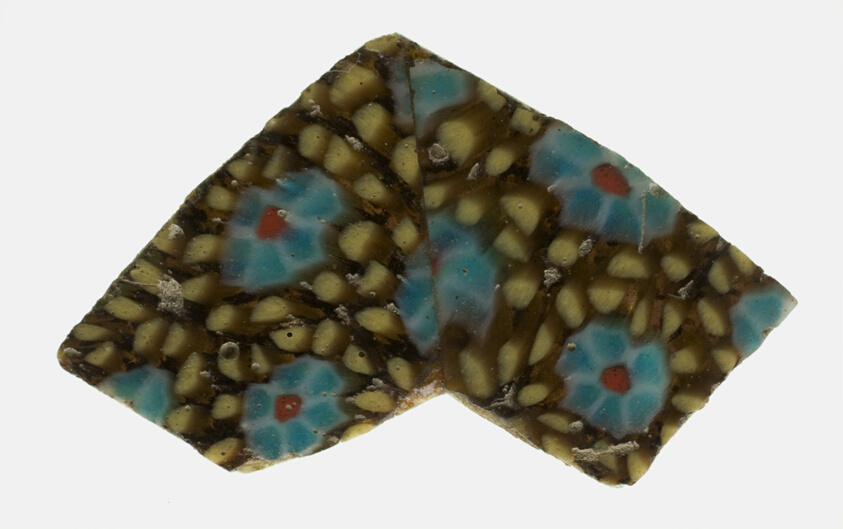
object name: Decorative Arts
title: Fragment of a Plate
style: roman (ancient, style or period), ancient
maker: Roman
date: 1st century BCE–1st century CE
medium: Glass, mosaic glass technique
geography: Roman Empire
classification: fragment; decorative arts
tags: decoration